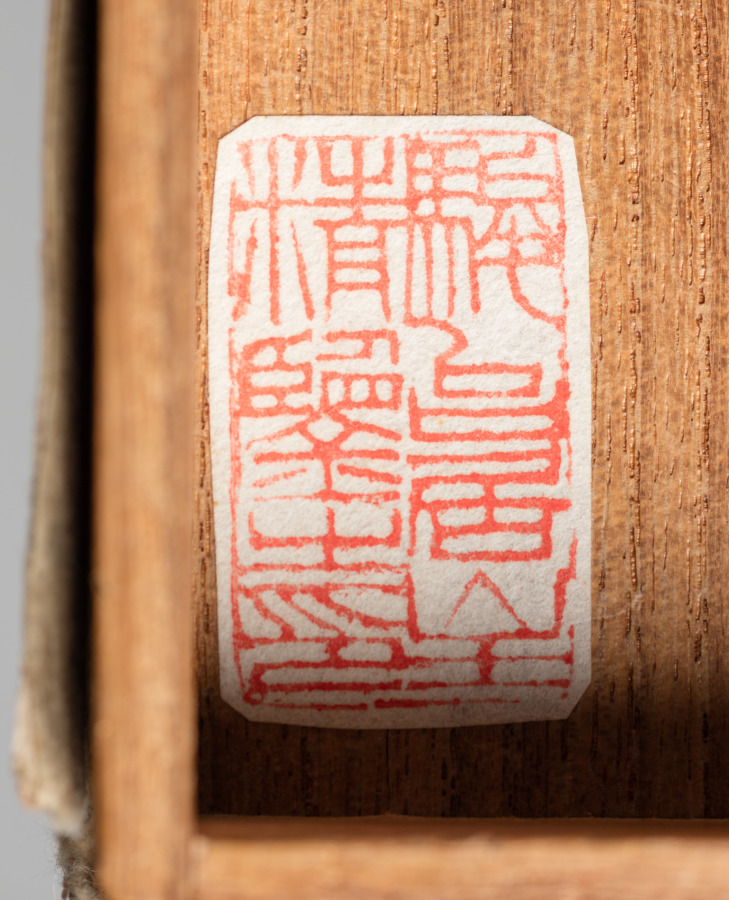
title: Landscape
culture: Japan, Edo period (1615–1868)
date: early 1600s to mid-1800s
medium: hanging scroll; ink on paper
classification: Painting